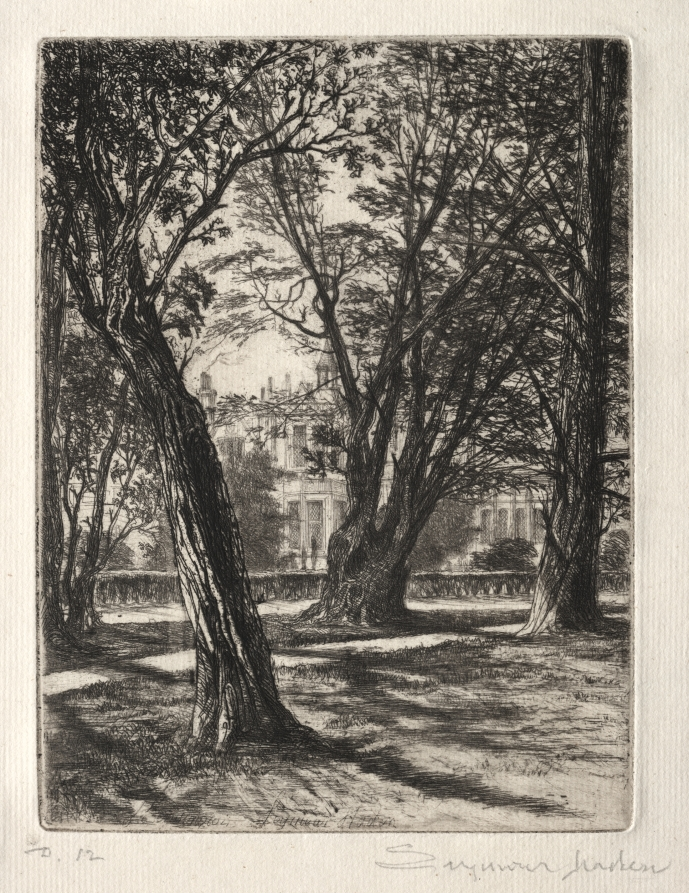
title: Kensington Gardens (The Small Plate)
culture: England, 19th century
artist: Francis Seymour Haden (British, 1818–1910)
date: 1859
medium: etching and drypoint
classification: Print